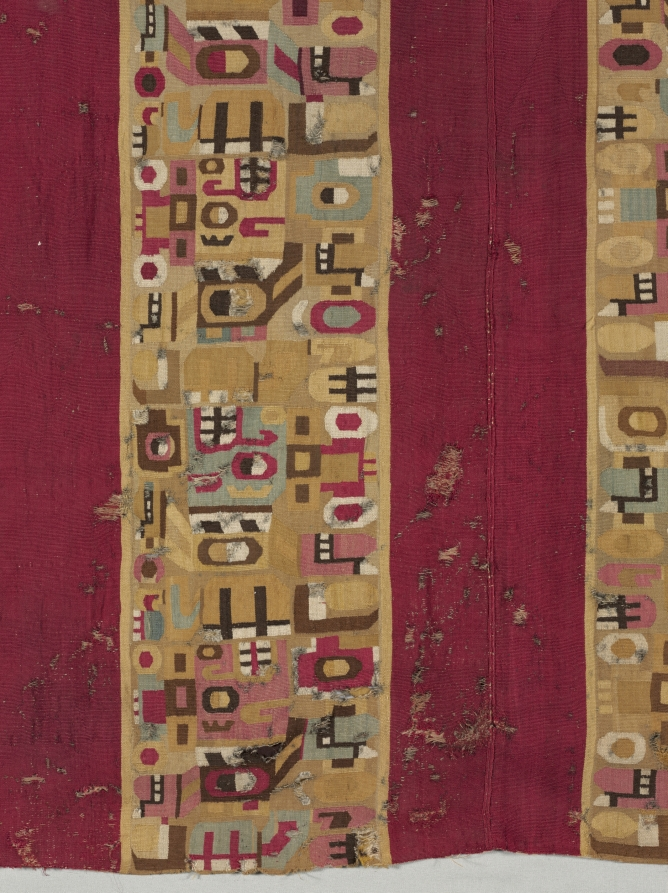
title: Tunic with Sacrificer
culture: South America, Peru, Central Andes, Middle Horizon, Wari people, 7th-11th century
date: 600–1000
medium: camelid-fiber, cotton; tapestry weave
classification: Textile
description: An extremely abstract supernatural sacrifice repeats in different colors and orientations across the body of this tunic, which was shortened on one side in antiquity. Look for the toothy black-and-white mouth in the sacrificer's upward-gazing head; other facial features include a button nose and a vertically divided eye. The figure holds the L-shaped haft of an axe behind its back and, at the front of its body, a short staff with a severed, upside-down human head on the top.